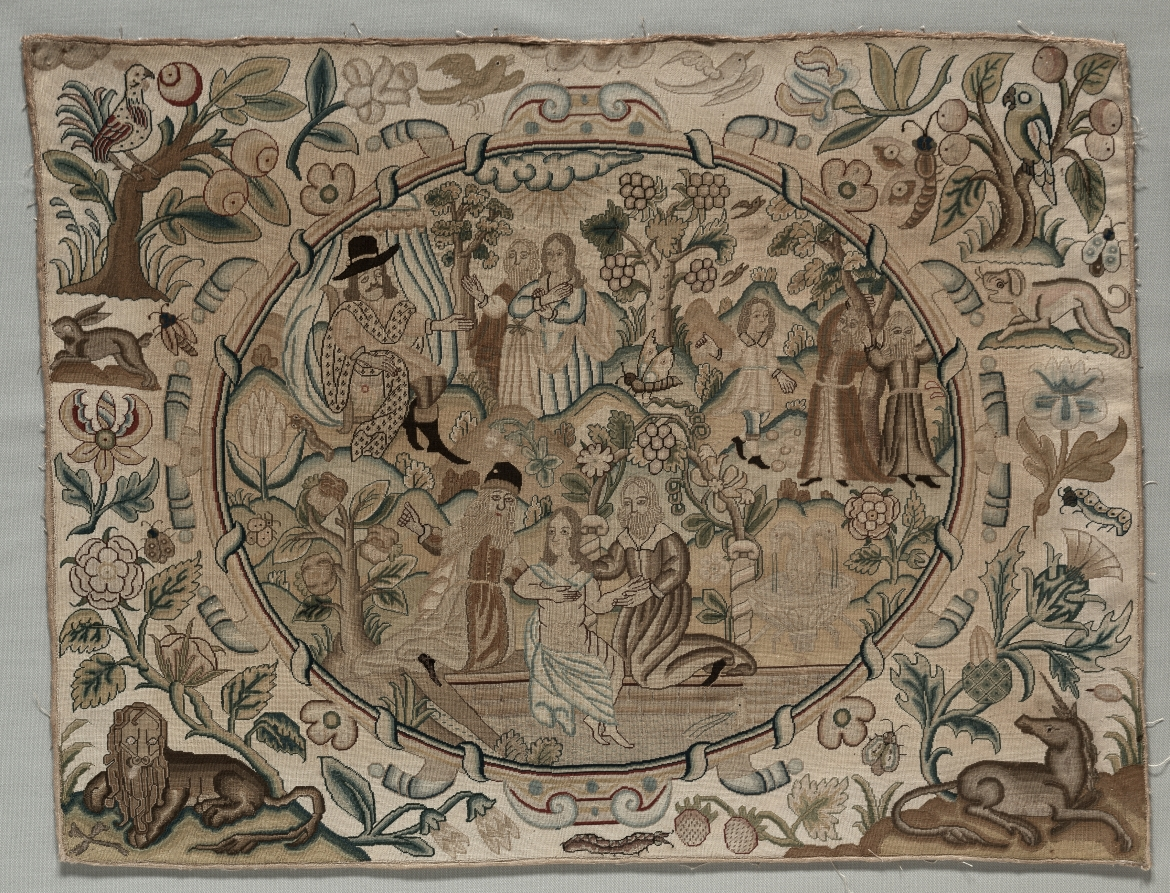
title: Embroidery au Petit Point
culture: England, 17th century, Charles I Period (1625-1649)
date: 1625 – 1649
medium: petit-point embroidery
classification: Embroidery